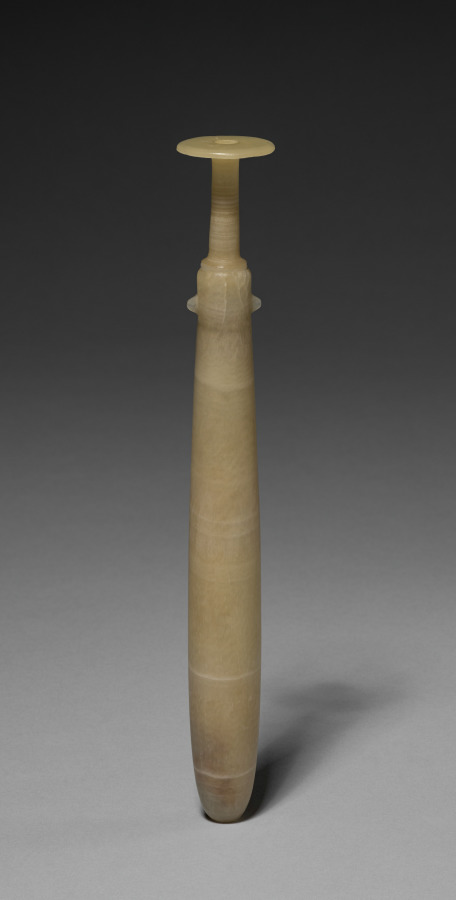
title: Alabastron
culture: Egypt, Greco-Roman period (332 BCE–395 CE), Ptolemaic dynasty (305–30 BCE)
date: 305–222 BCE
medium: travertine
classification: Vessels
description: Both ancient Egyptian men and women loved cosmetics. Unguents, oils, and perfumes made from aromatic plant resins and gums were obtained at great cost from distant lands. The objects identified with cosmetics were given lavish treatment.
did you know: This perfume holder might have been attached to a string, making it easily portable.